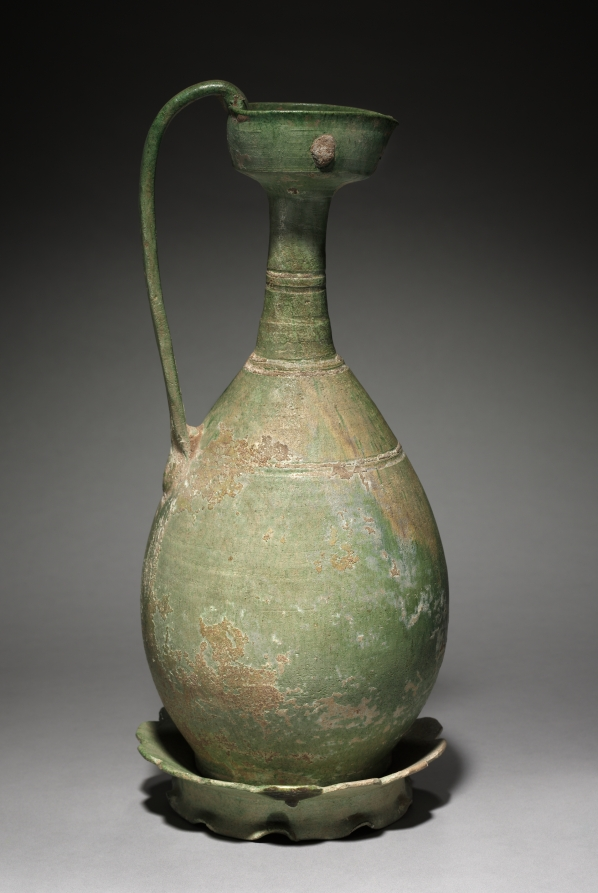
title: Ewer with Corolla Base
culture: China, Manchuria, Liao dynasty (916-1125)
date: 907–1125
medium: pottery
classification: Ceramic